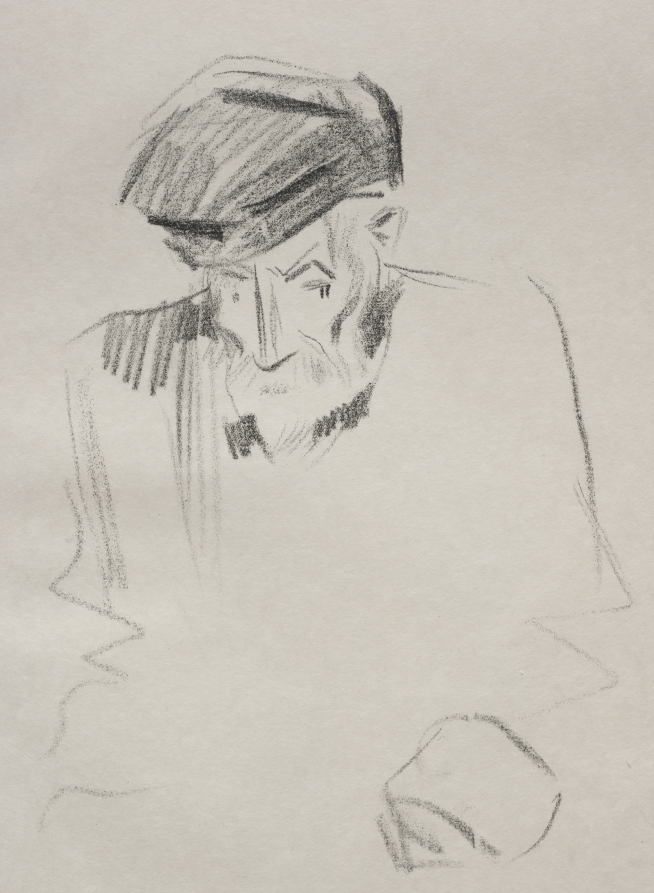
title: Pierre Auguste Renoir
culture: France, 19th century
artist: Jean Louis Forain (French, 1852–1931)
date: c. 1905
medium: lithograph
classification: Print